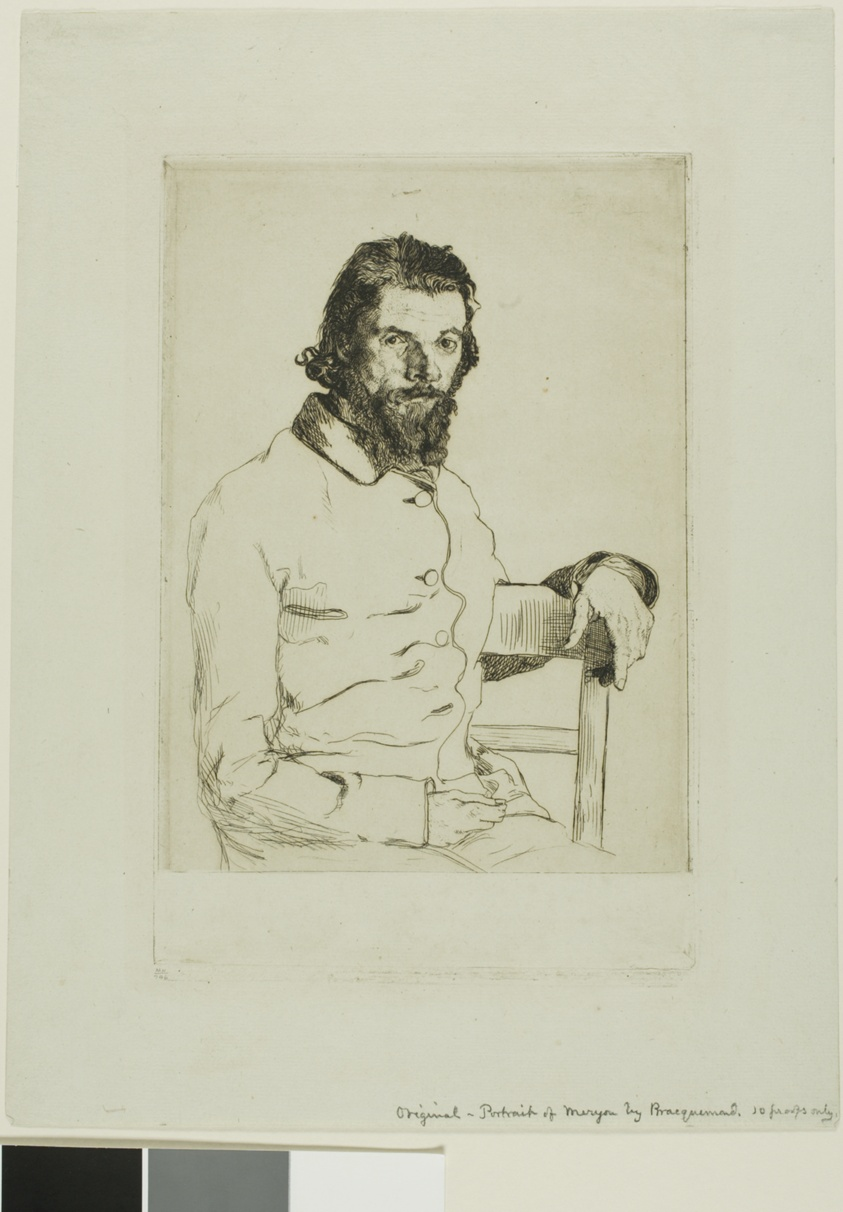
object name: Print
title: Portrait of Meryon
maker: Felix Bracquemond; French, 1833–1914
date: 1853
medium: Etching on light blue laid paper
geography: France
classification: etching; print; prints and drawing